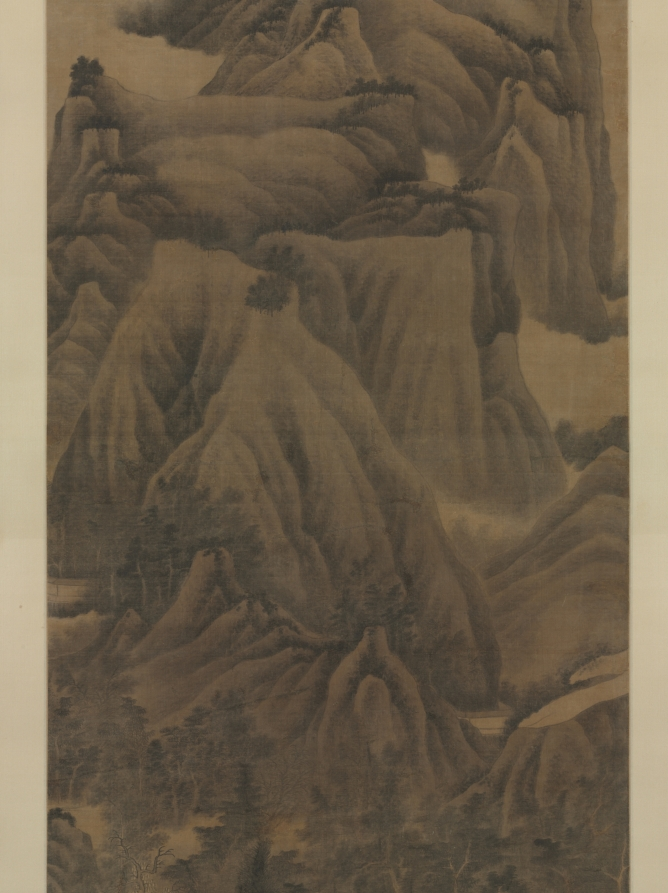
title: Landscape in the Style of Dong Yuan and Juran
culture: China, Qing dynasty (1644-1911)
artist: Gong Xian (Chinese, 1599–1689)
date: c. 1650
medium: hanging scroll, ink with white pigment on silk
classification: Painting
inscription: 畫家董巨，實開南宗。既無剛根之氣，復無刻畫之跡。後之作者或以才見，或以法稱。唯董巨則幾乎道矣。然逞才則離法，泥法則叛道。至道無可道。說者謂即歛才就法之謂道。問之董巨，而董巨不知，忽乎微矣。此幅余二十年前舊作。藏之新安吳氏。吳君晉明寶之若家珍。後携之金陵。命余題識。余因與晉明論畫及此，并紀之。非敢曰此效法董巨而有得焉者也。 庚戌冬杪半畝居人龔賢。 [印]龔半千; 野遺賢; [左下]龔賢; [上]可能另有龔賢一印。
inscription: 2 additional seals of Cheng Qi 程琦 (1911–1988)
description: Towering peaks and unfolding ranges are piled up and overlaid with layer after layer of brushwork to give an overall dense, dark, and even melancholic effect. Gong Xian created a personal style of landscape, which departed greatly from his models Dong Yuan and Juran. The tension between tradition and individuality had been a topic of interest for the Chinese artist. As Gong Xian writes in his inscription: "Painters of later periods may be known for their natural talents or praised for their observance of established traditions. . . . However, those who indulge in showing off their talent will deviate from the tradition, while those who adhere to tradition will alienate themselves from the Dao. The supreme Dao is inexplicable in words. . . ."